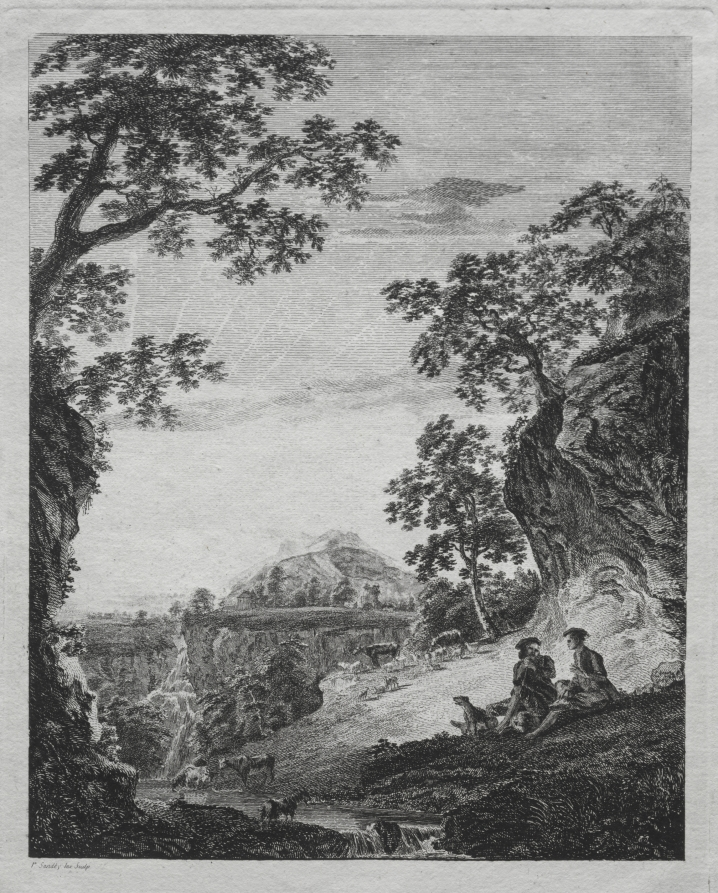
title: Patie and Roger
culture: England, 18th century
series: The Gentle Shepherd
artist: Paul Sandby (British, 1731–1809)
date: 1758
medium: etching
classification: Print